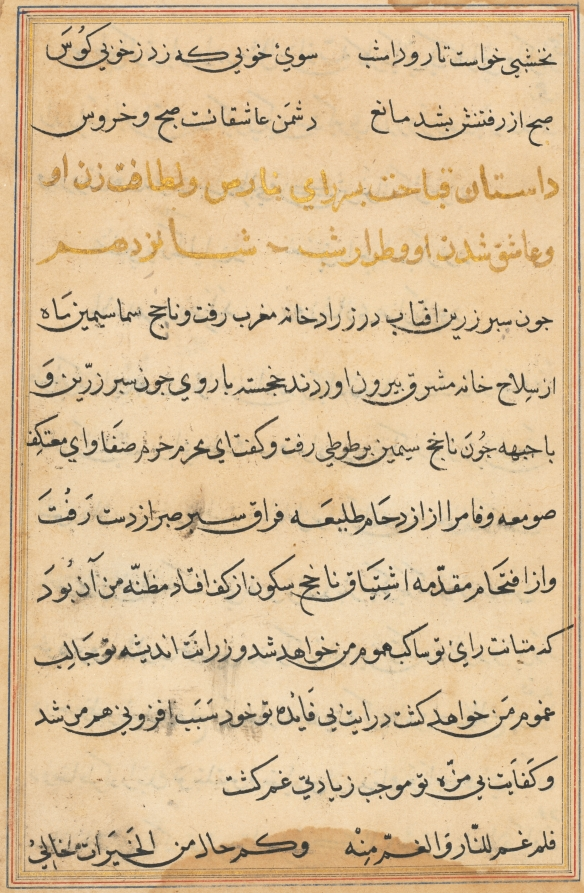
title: Page from Tales of a Parrot (Tuti-nama): text page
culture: Mughal India, court of Akbar (reigned 1556–1605)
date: c. 1560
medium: gum tempera, ink, and gold on paper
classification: Painting